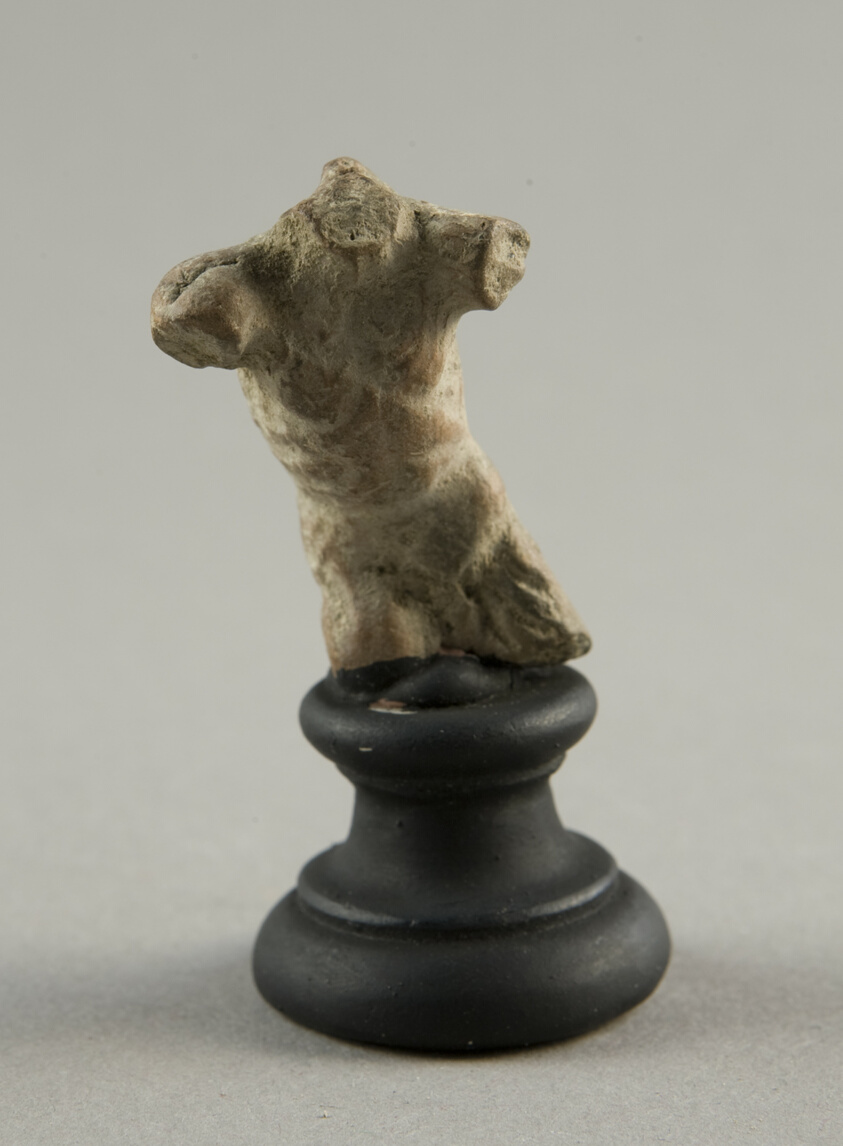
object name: Sculpture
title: Torso of a Nude Man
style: greek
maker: Greek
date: 3rd-1st century BCE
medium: terracotta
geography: Greece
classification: earthenware; ceramics; sculpture; ancient art